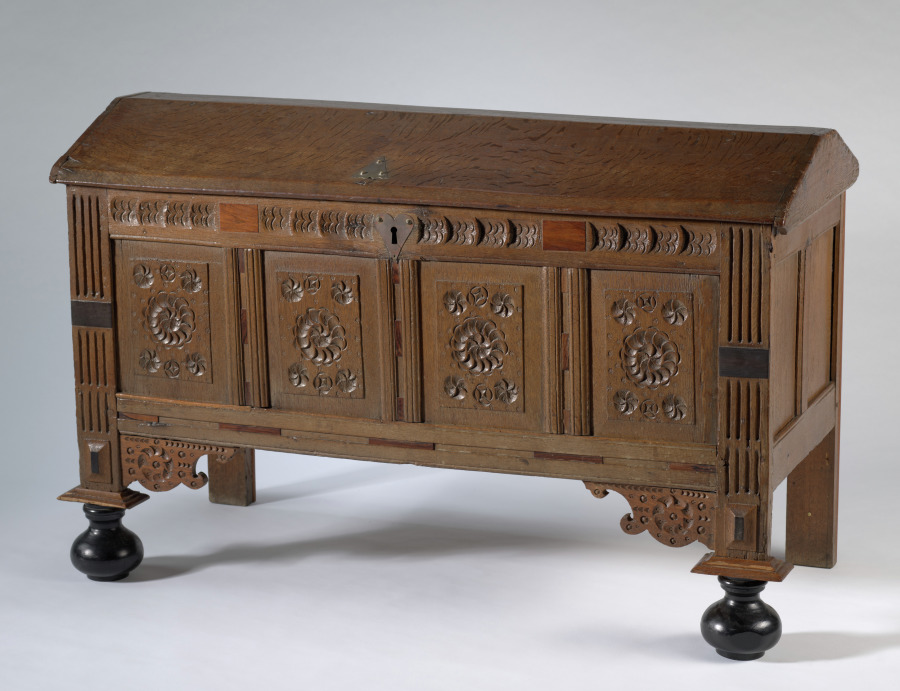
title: Chest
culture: Netherlands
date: 1600s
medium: oak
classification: Furniture and woodwork